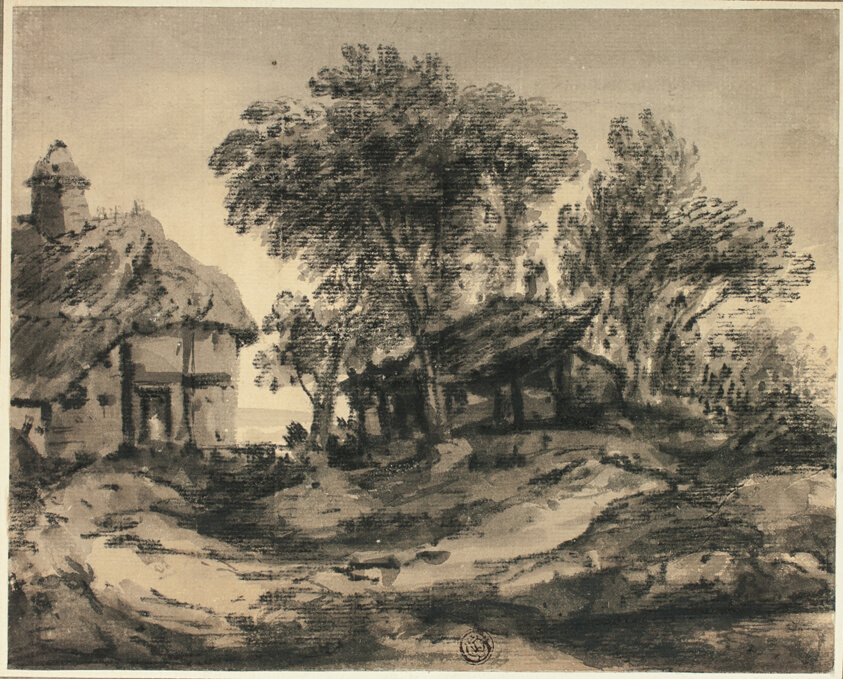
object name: Drawing and Watercolor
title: Huts Near the Sea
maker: Thomas Monro (English, 1759-1833)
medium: Black crayon and brush, with black wash, on cream laid paper, laid down on ivory laid card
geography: England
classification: crayon; drawings (visual works); prints and drawing